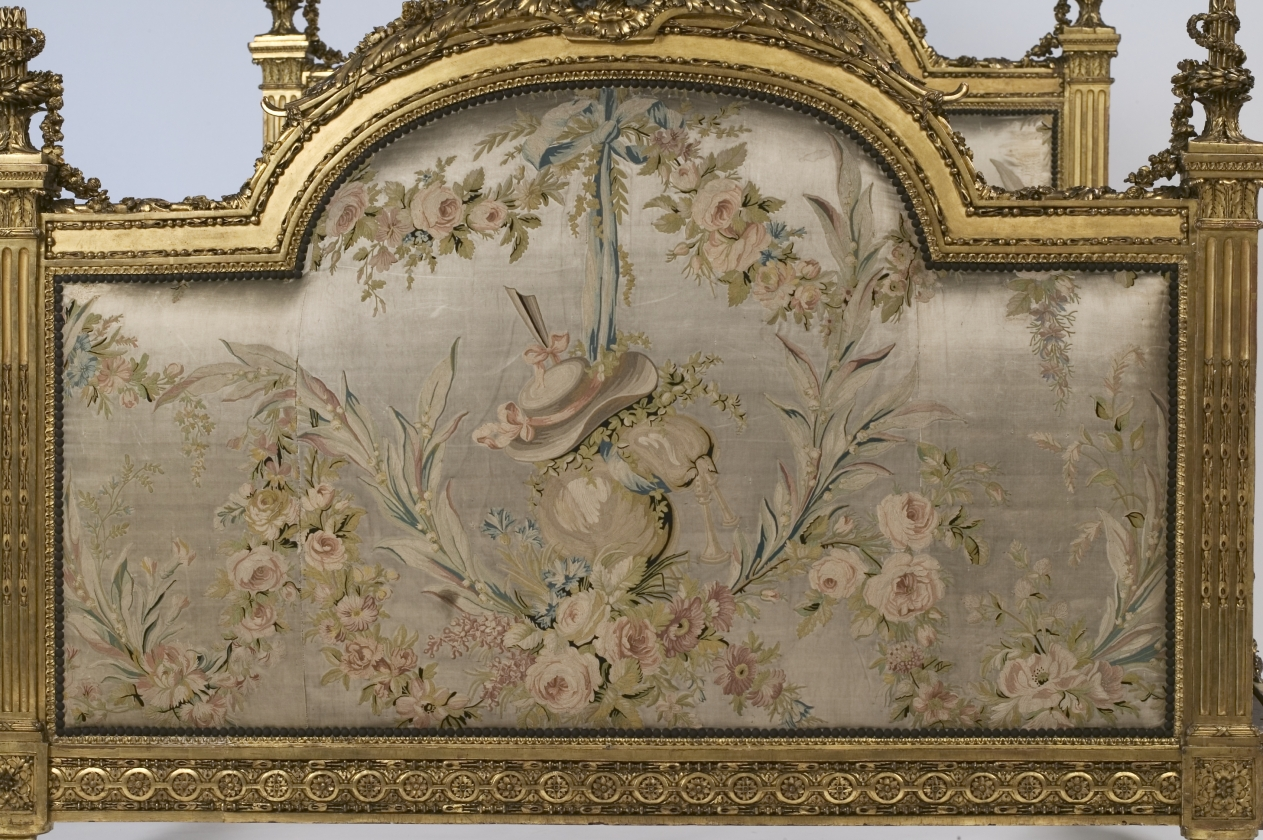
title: Bed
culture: France, 18th century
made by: attributed to Georges Jacob (French, 1739–1814)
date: 1700s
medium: gilded wood and embroidered satin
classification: Furniture and woodwork